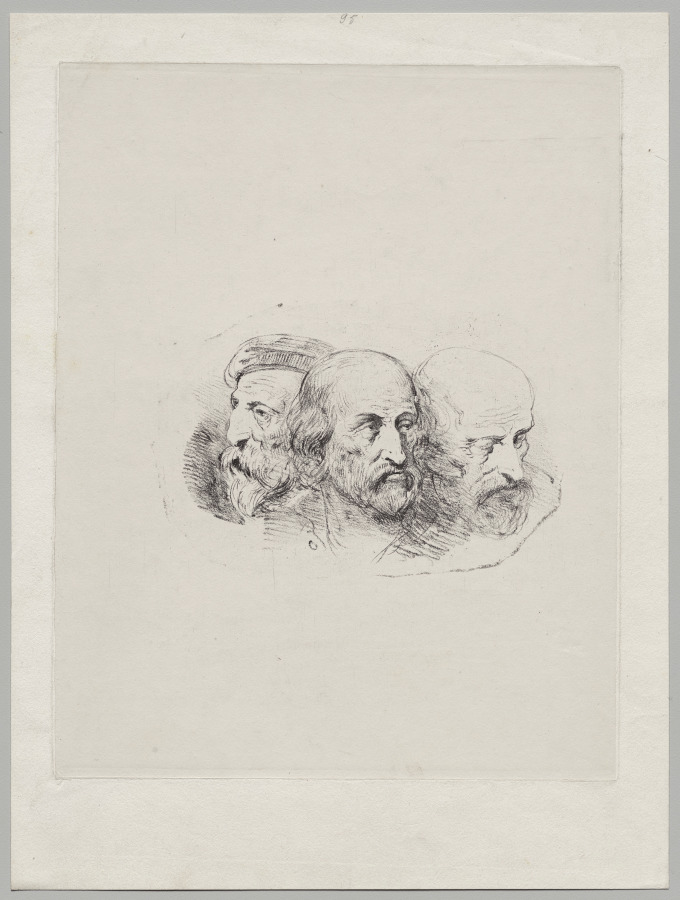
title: Portrait of Nicolas Toussaint Charlet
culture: France, 19th century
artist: Anonymous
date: 1800s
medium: lithograph with chine collé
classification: Print